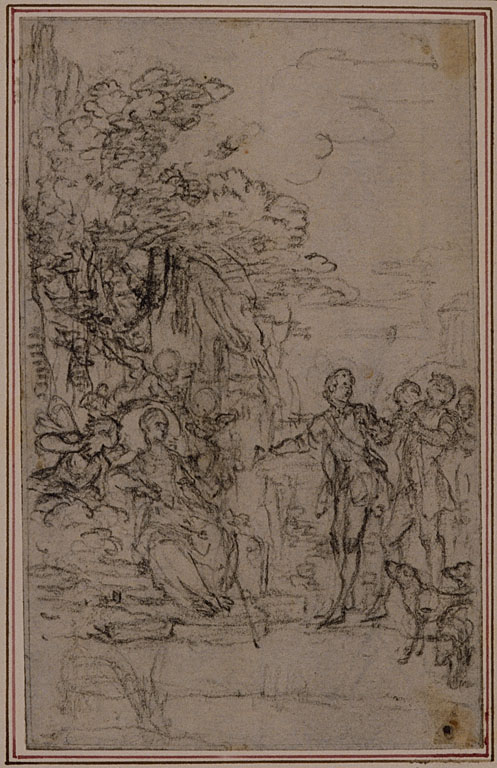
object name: Drawing and Watercolor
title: Study for Vignette in Fontenelle's (attr.) "Les Amours de Mirtil", Canto II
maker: Hubert François Gravelot (French, 1699-1773)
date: c. 1761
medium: Black chalk, on gray laid paper, laid down on ivory laid paper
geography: France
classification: chalk; drawings (visual works); prints and drawing